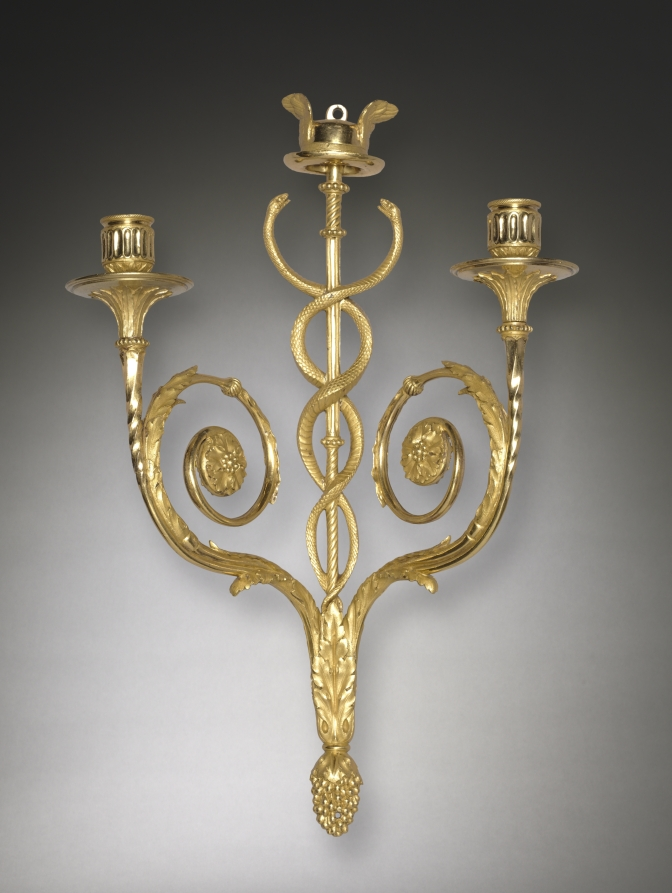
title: Louis XVI Style Candle Bracket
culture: France, style of Louis XVI, 18th Century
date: c. 1775–1790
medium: gilded bronze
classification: Furniture and woodwork